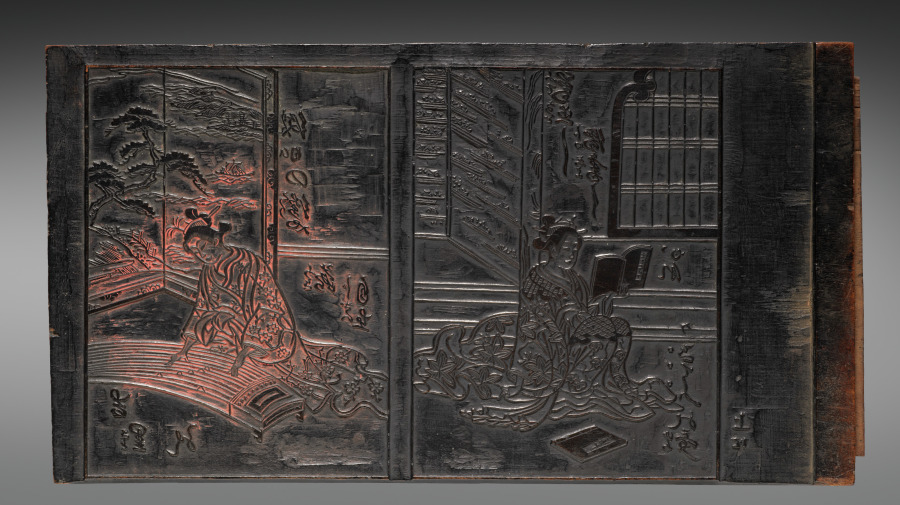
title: Print Block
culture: Japan, Edo period (1615–1868)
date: 1700s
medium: woodblock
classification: Woodblock